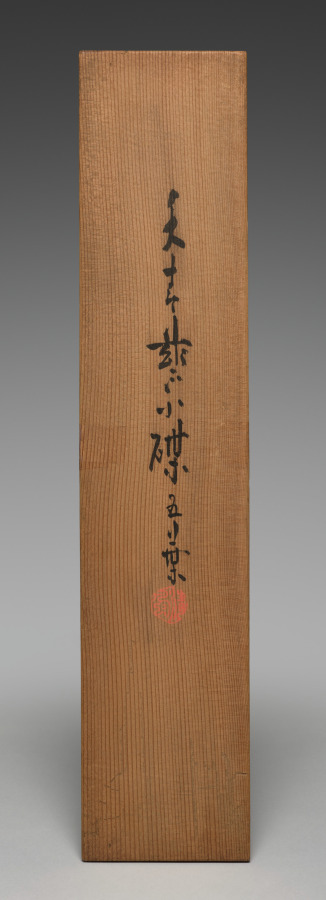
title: Maple Leaf-Shaped Saucers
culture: Japan, Meiji period (1868–1912)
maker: Seifū Yohei III (Japanese, 1851–1914)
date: 1893–1914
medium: Set of five saucers; porcelain with molded design and blue glaze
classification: Ceramic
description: These maple leaf–shaped saucers, like Yohei III's 5 shell saucers CMA 2022.188, have a long, horizontal box with a separate compartment for each piece. Now a set of 5, these dishes were originally a set of 10, stored in two boxes of 5 each. From their housings, which accommodate differing numbers of objects, one can hypothesize that while some items created by the Seifu studio were intended to be acquired in larger sets, and thus were perhaps made to order, others, like these, may have been items to be purchased off the shelf in set quantities that allowed clients flexibility in scale. The box for thesev5 saucers describes them as “heavenly blue[–glazed] porcelain” (tenseiji). The veins of the leaves are slightly raised in the clay so that the glaze pools around them and they stand out as white where the glaze thins. There are longer lines at the points of the leaves and shorter ones following the wall of each indentation so that the design has both a horizontal and a subtle vertical dimension. Each saucer has a round foot.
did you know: These saucers shaped like maple leaves show Seifū Yohei III’s “heavenly blue glaze.”